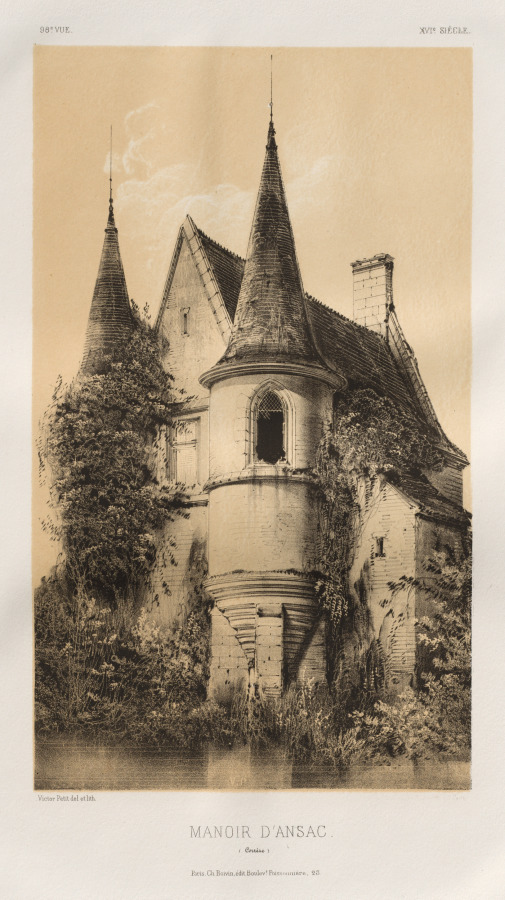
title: Architecture Pittoresque ou Monuments des XVeme. Et XVIeme. Siecles: Chateaux de France des XV et XVI Siecles: Pl. 98, Manoir d'Ansac (Corrèze)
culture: France, 19th century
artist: Victor Petit (French, 1817–1874)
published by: Charles Boivin (publisher and editor); Lith de Godard a Paris (printer)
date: 1860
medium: lithograph with tint stone, from portfolio of 100 lithographs with tint stone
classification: Print